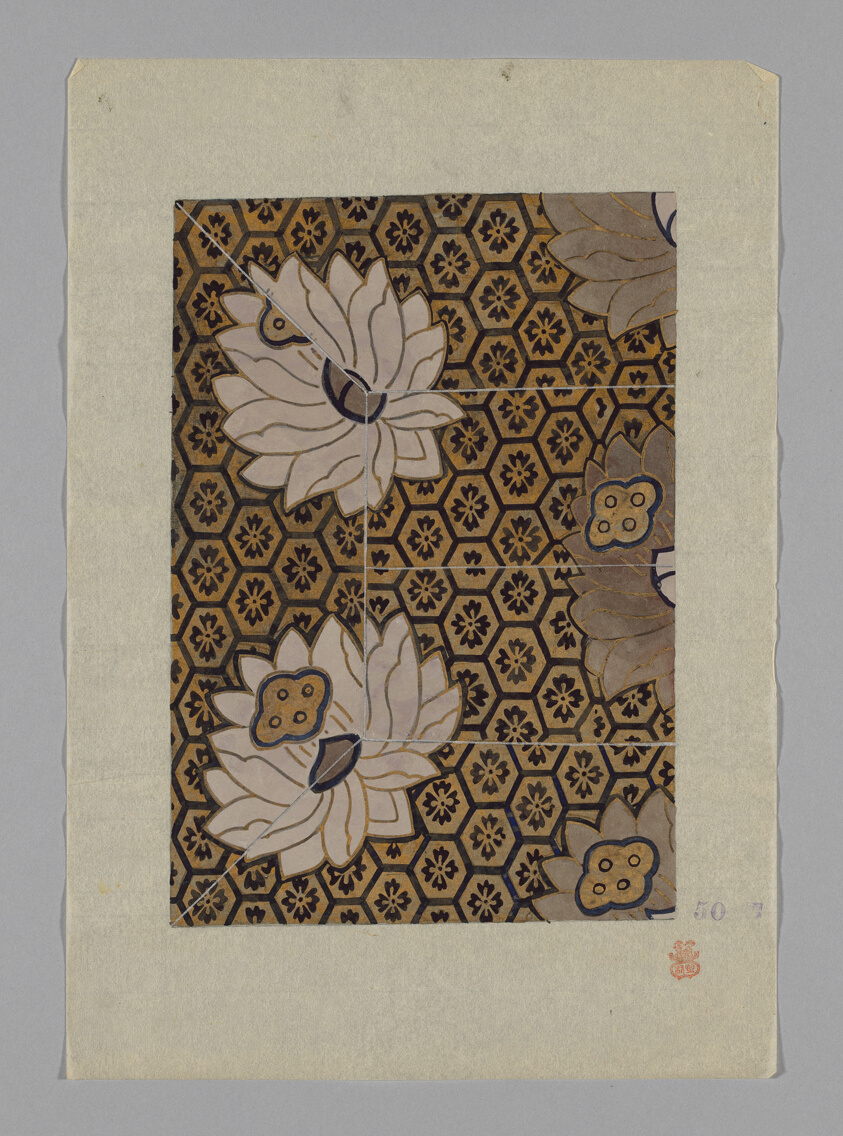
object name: Drawing and Watercolor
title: Design on Paper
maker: Japan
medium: Paper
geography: Japan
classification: textile; accessory - paper design; watercolor; paper